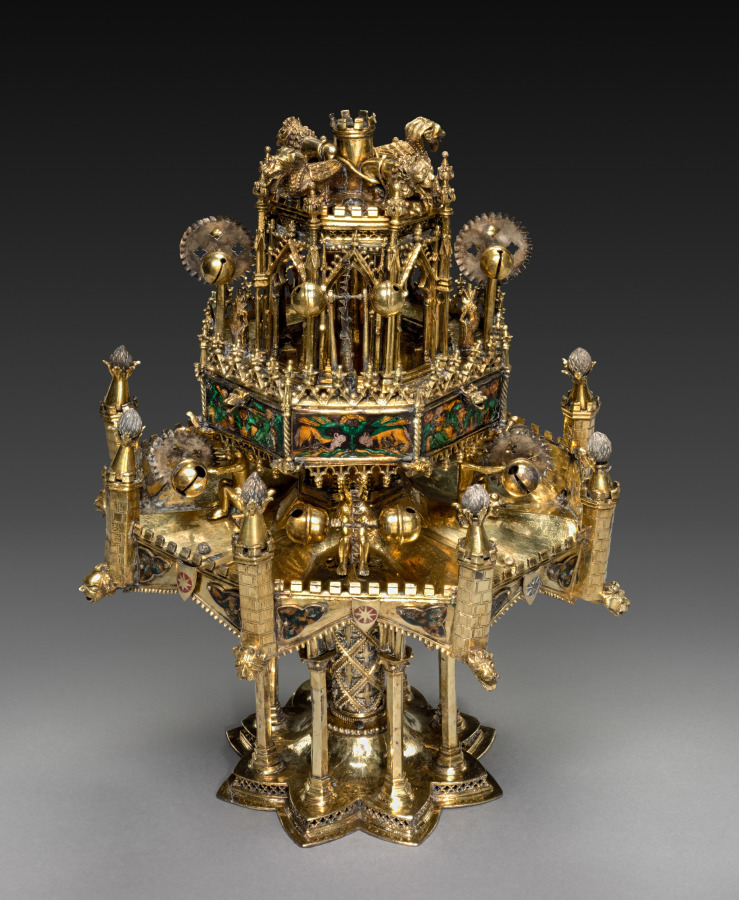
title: Table Fountain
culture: France, Paris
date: c. 1320–40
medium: gilt-silver and translucent enamels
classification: Metalwork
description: Conceptually and stylistically, this object is beyond all else a piece of Gothic architecture in miniature with vaults, pinnacles, columns, and traceried arches. Though the artist who created it is unknown, he was unquestionably inspired by the great Gothic buildings of his time. The table fountain is a three-tiered assembly combining cast elements with bent sheets of gilt-silver. To these have been attached a series of enamel plaques representing grotesque figures, some of which play musical instruments. Water wheels and bells were added to capture motion and sound. The rich detail, precious materials, and involved ornamentation of this deluxe object suggest it would have been expensive to produce and highly treasured by its original owner, someone of high status, and would have been deployed as an object of spectacle. This is the most complete example of its type known to survive from the Middle Ages. Medieval inventories reveal that small fountains like this, often taking various forms, and generally made from precious metals, once existed in large numbers, thus making the Cleveland table fountain an extremely rare object.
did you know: This fountain with its minute architectural details and finely made enamel plaques displayed the wealth and refinement of the owner as it entertained his guests. Imagine hearing the ringing of the tiny bells when this fountain was in use.